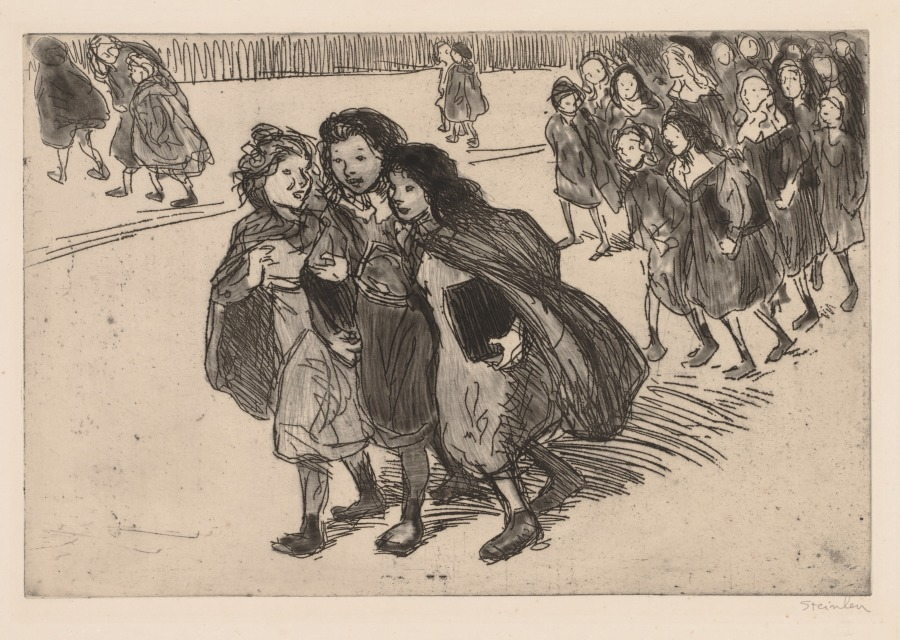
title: Coming from School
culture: Switzerland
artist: Théophile Alexandre Steinlen (Swiss, 1859–1923)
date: 1911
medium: etching and aquatint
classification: Print